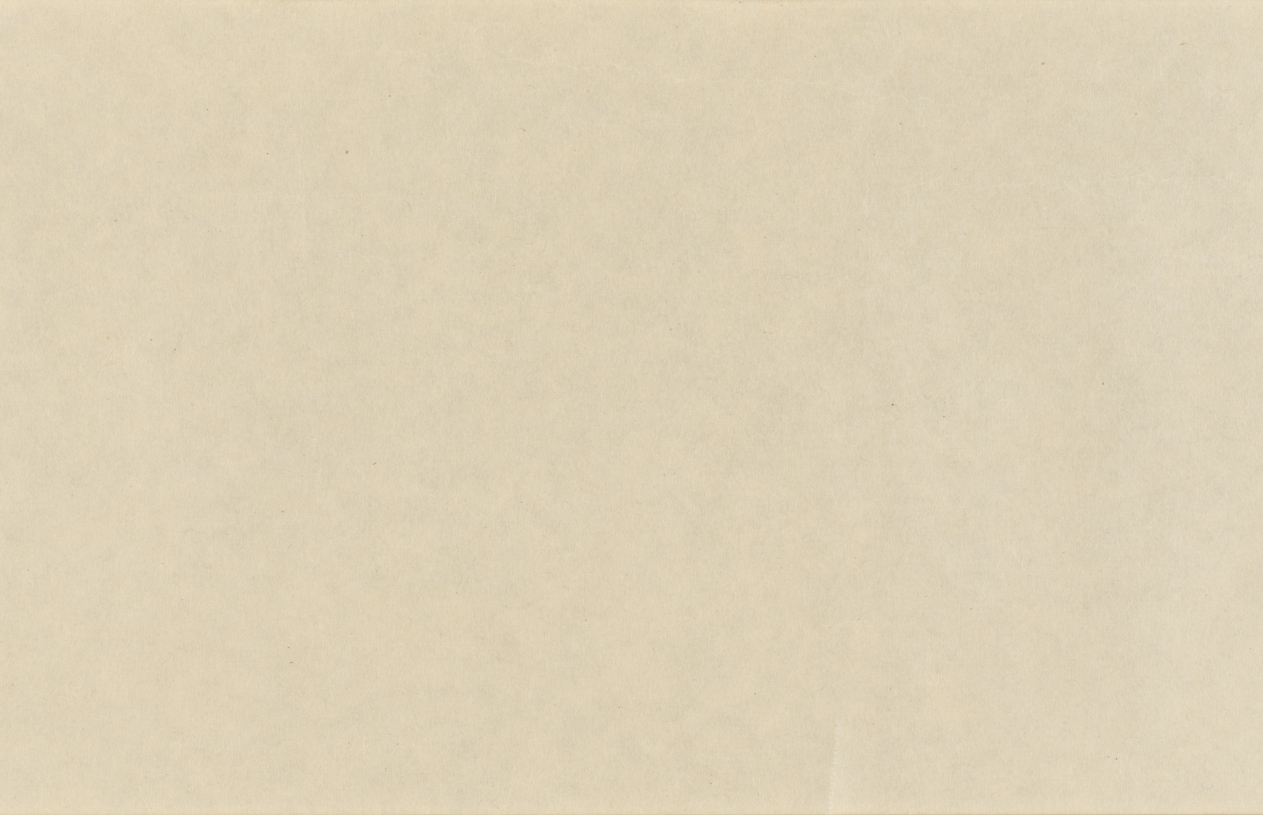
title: Eight Views of Xiao-Xiang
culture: Japan, Muromachi period (1392–1573)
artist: Sesson Shūkei (Japanese, c. 1492–c. 1577)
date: 1500s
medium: handscroll; ink on paper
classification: Painting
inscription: Signature and seal of artist at end of painting.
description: Eight Views of the Xiao and Xiang Rivers can be traced to 11th-century Chinese poems and paintings, the depiction of which had also become popular among Korean and Japanese painters. Xiao-Xiang refers to the region in present-day Hunan province where the Xiao and Xiang rivers converge. Few painters of the Eight Views had in fact seen the scenery; rather, they were trying to portray in ink and wash the lyrical qualities of dim light and a misty atmosphere typical of that region. Each of the poetic titles suggests a time of day, a season, or specific atmospheric conditions—subjects that challenged the abilities of the most talented artists. In this miniature painting (shukuzu) of the Muromachi period, Japanese Zen monk and painter Shukei Sesson depicted all eight views featured in Chinese prototypes: Wild Geese Descending to Sandbar; Returning Sails Off a Distant Coast; Mountain Market in Clearing Mist; River and Sky in Evening Snow; Autumn Moon over Dongting Lake; Night Rain on the Xiao and Xiang; Evening Bell from Mist-Shrouded Temple; and Fishing Village in Evening Glow.